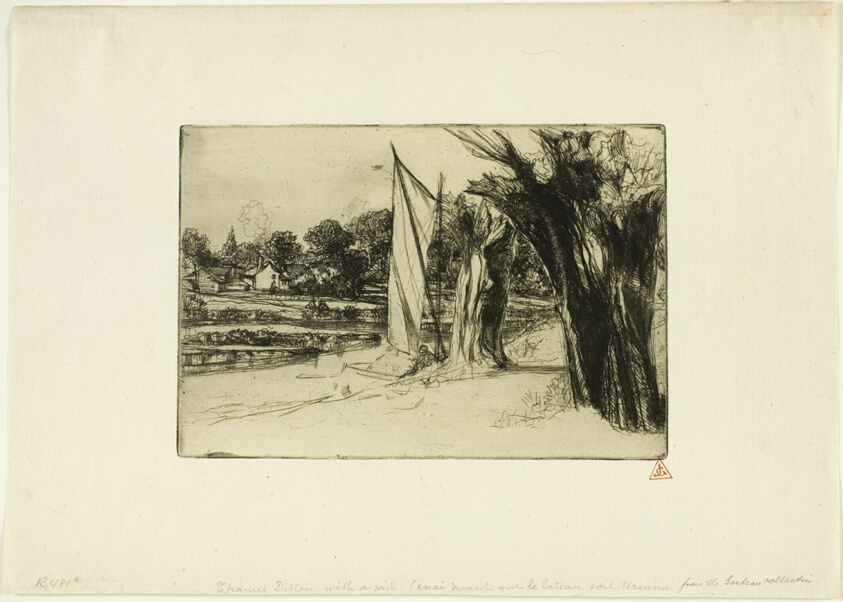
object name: Print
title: Thames Ditton-with a Sail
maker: Francis Seymour Haden (English, 1818-1910)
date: 1864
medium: Etching on ivory laid paper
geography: England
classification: etching; print; prints and drawing